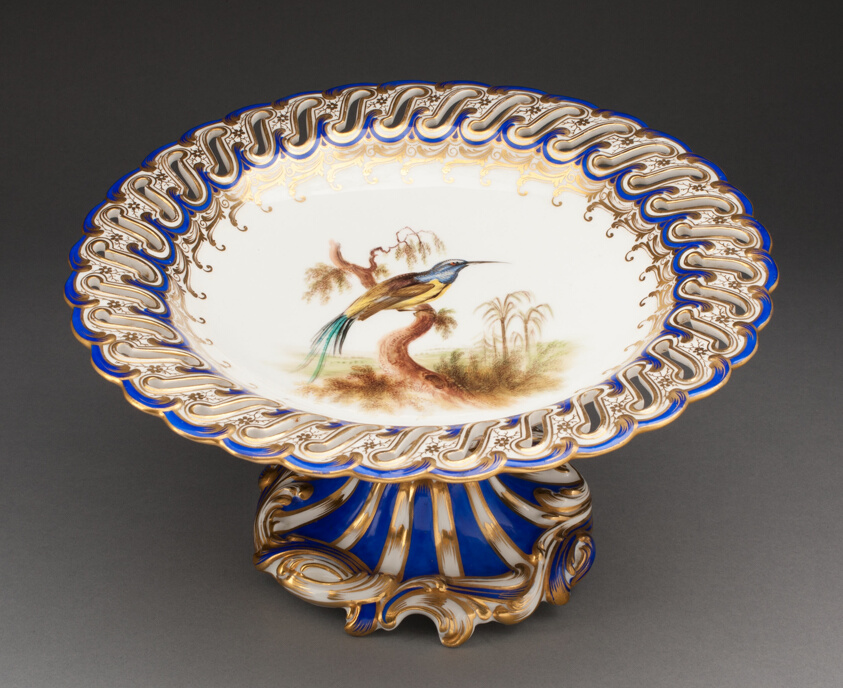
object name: Ceramics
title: Compote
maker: Worcester Porcelain Factory (Chamberlain & Co. Period, 1840—1852); Worcester, England, founded 1751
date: 1849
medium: Soft-paste porcelain with polychrome enamels and gilding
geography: England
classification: compote; tableware; dish (vessel); ceramics; porcelain; european decorative arts